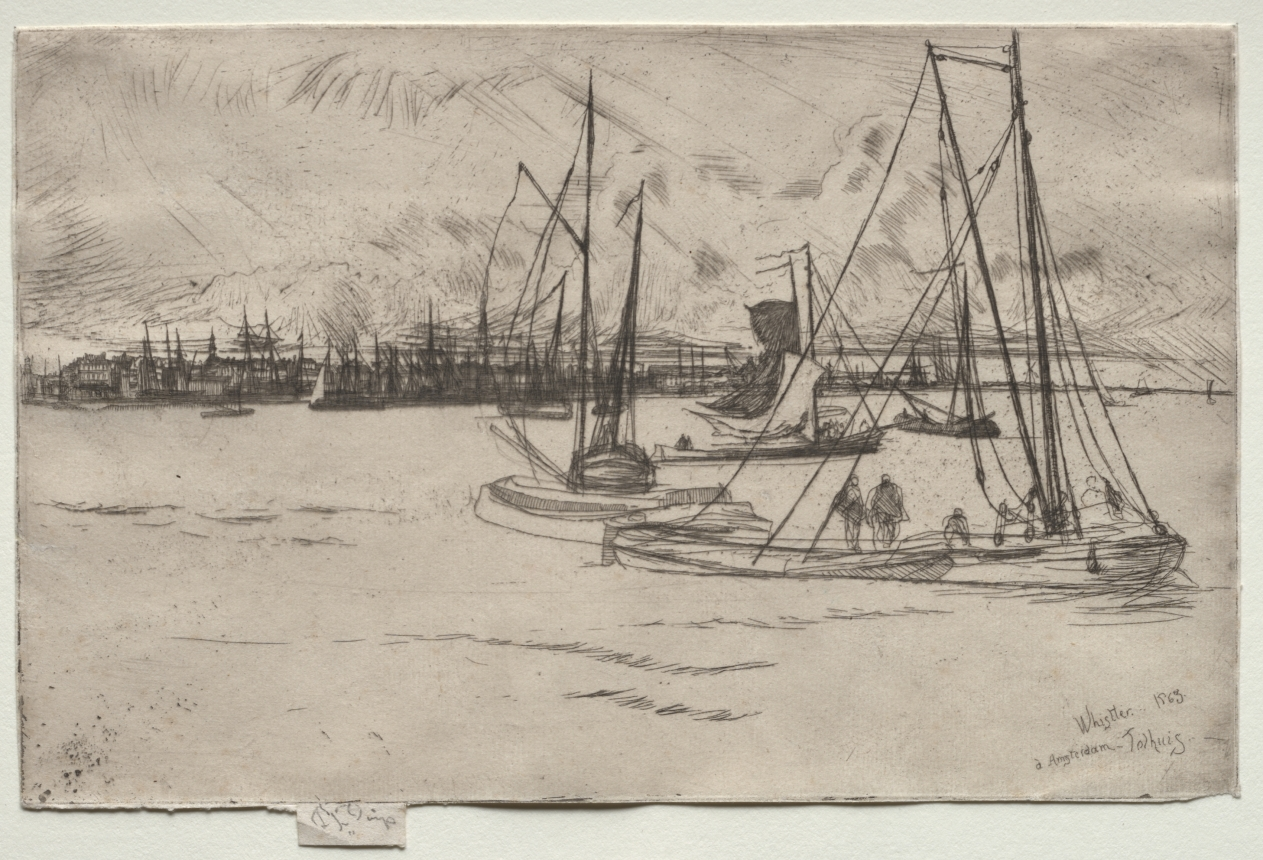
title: Amsterdam from the Tolhuis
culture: America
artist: James McNeill Whistler (American, 1834–1903)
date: 1863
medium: etching and drypoint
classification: Print